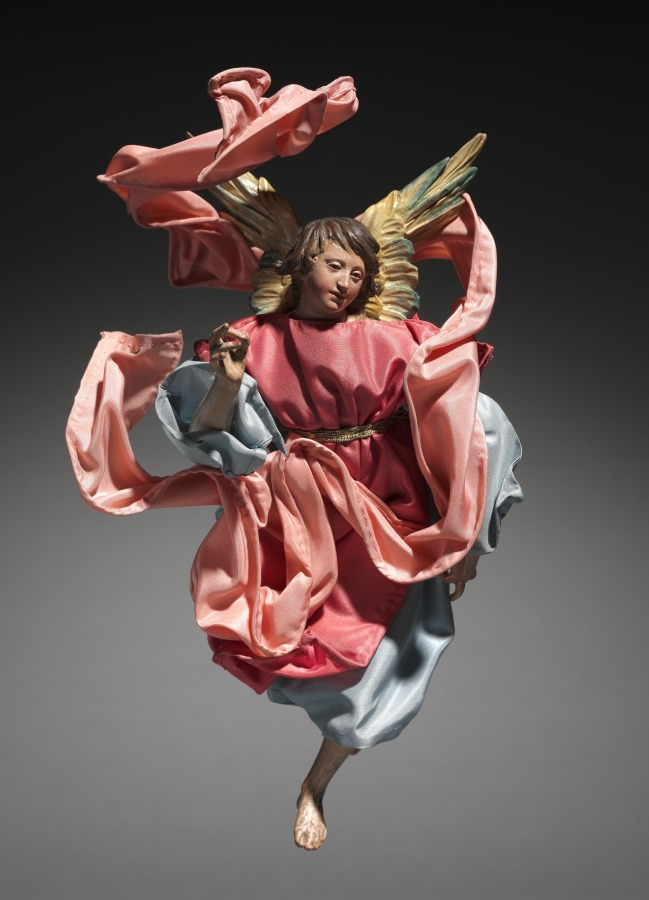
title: Figure from a Crèche: Angel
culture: Italy, Naples, late 18th-early 19th century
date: 1780–1830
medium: painted wood and terracotta with various textiles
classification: Sculpture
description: The practice of creating scenes of the Nativity for the home dates from the early 1700s in Italy, where people began to set up doll-like figures of about a foot or less in height. The custom was particularly popular in Naples around 1800, where crèche scenes (crèche means cradle, or crib) included many figures, whose heads and hands of painted terracotta, stuffed cloth bodies, and clothing adapted from contemporary local costumes gave them an amazingly realistic character. Representations of the birth of Jesus can be traced to the first few centuries of Christianity. Both living creatures and sculptural depictions of them were used from early times. By the late middle ages it was customary to create life-size figures of wood or stone, naturalistically painted, to represent the characters who participated in the events of Jesus's early life. These sculptures were then arranged in scenes illustrating one or both of the most important of these events, the Adoration of the Shepherds and the Adoration of the Magi-the three kings from the East who came to pay homage to the Christ child. Used in churches, these large figures were especially popular in Italy, Central Europe, Spain, and Portugal.